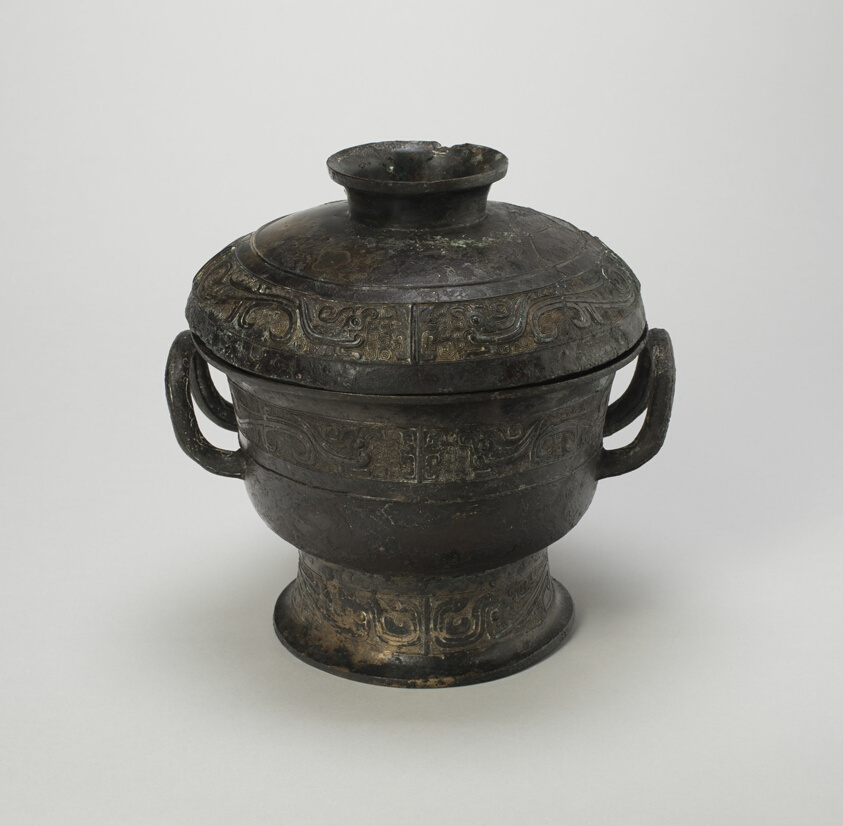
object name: Vessel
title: Covered Food Container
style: Chinese (culture or style)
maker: China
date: Western Zhou dynasty ( 1046–771 BC ), mid–10th century BC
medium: Bronze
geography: China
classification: vessel; bronze; metal; asian art